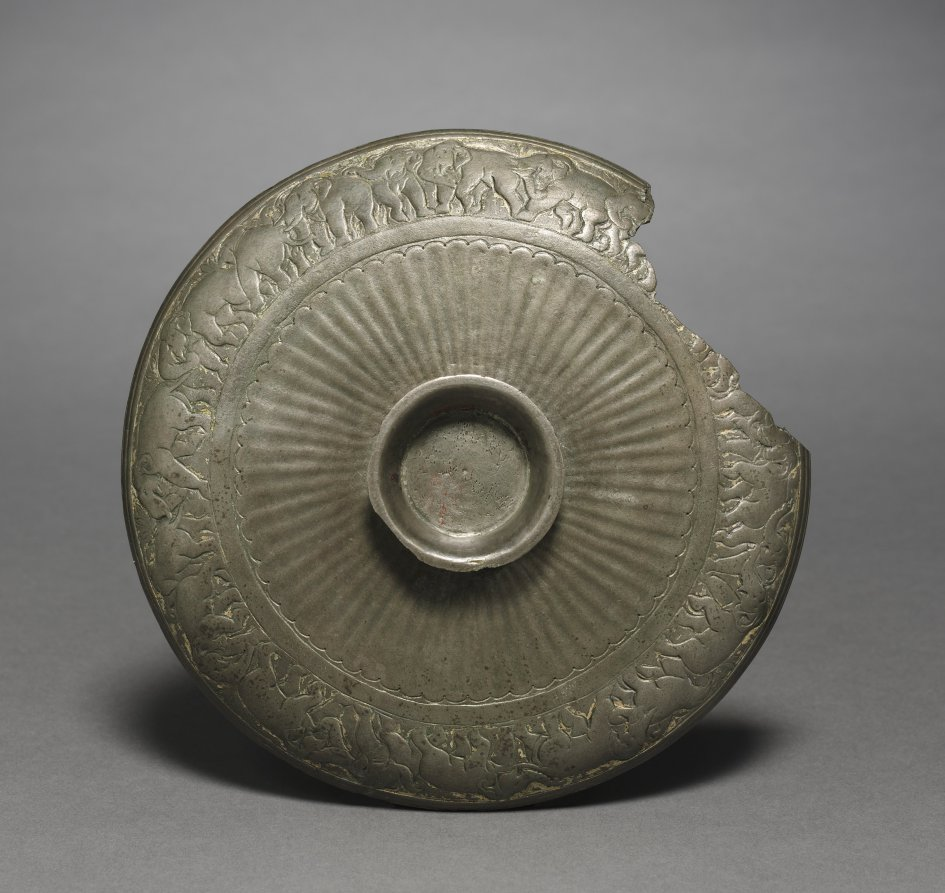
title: Plate with a Scene of Revelry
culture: Northwestern India, possibly Tanesara Mahadeva, Gupta period (320-647)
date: 400s CE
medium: silver with alloy of tin and lead with traces of gilding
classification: Metalwork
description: This rare example of a silver plate from the Gupta period in India depicts the celebration of a spring festival. Figures made during this period are characterized by smooth and rounded body contours and short hairstyles with rows of curls. Though crowded, the masterful composition appears harmoniously unified in its two-tiered circular arrangement of figures.